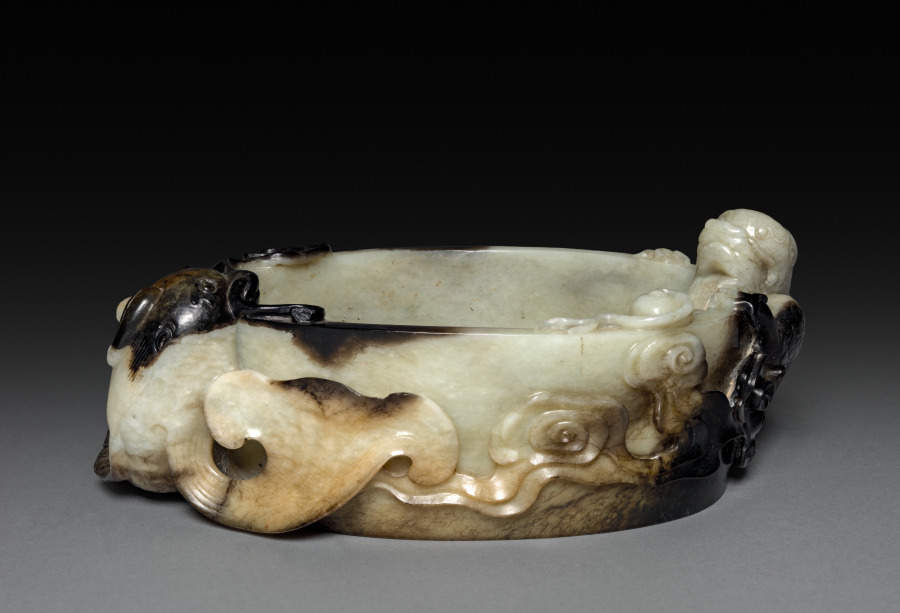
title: Dish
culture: China, Ming dynasty (1368–1644)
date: 1368– 1644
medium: jade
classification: Jade